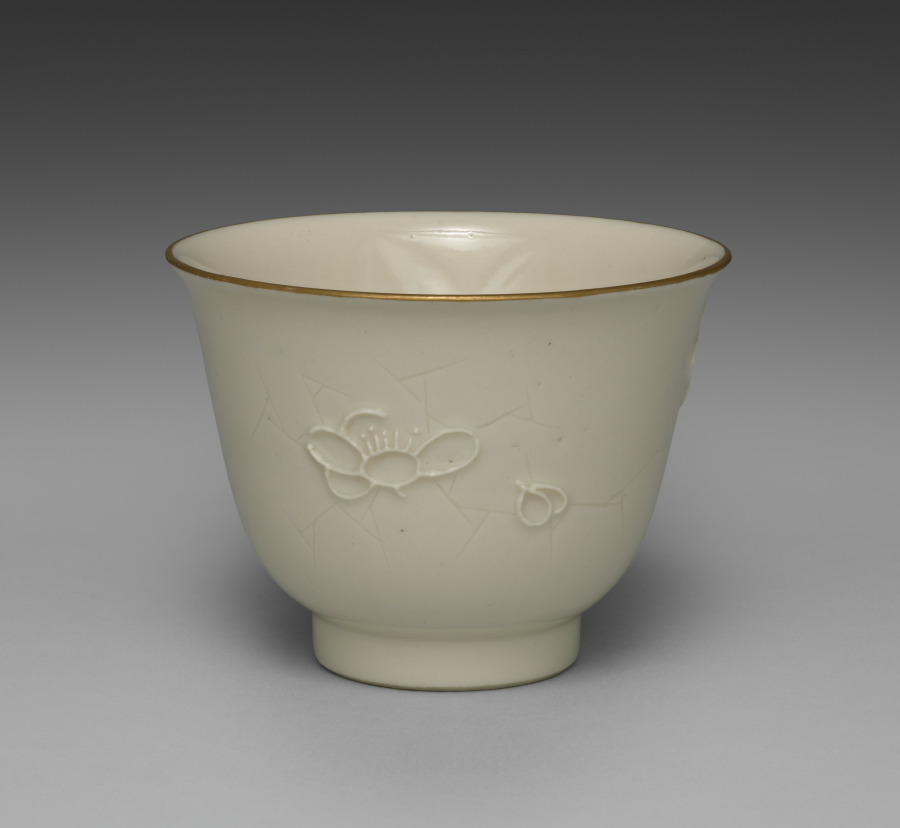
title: Drinking Cup from Dining Set with Plum Blossoms and Cracked-Ice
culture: Japan, Meiji period (1868–1912)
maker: Seifū Yohei II (Japanese, 1844–1878)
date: c. 1875–78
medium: Porcelain with molded designs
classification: Ceramic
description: Each item in this set has a delicate low-relief design of flowering plum branches over scattered, intersecting lines meant to resemble the cracked-ice surface of a frozen body of water and is signed on the base in gold pigment. While Yohei II produced many fine works in underglaze blue, like those produced by Kiyomizu Shichibei, he also made works in quite different styles later in his career, from the early 1870 s. In 1873, he was appointed purveyor to the Industrial Center of Kyoto Prefecture, a designation associated with Kyoto’s efforts to reach an international market through the port of Kobe; and from 1875 until his death, he was involved in national-level projects to present Japanese ceramics across the world. It was during this period that Yohei III was apprenticed to Yohei II, and it has been suggested that this set may in fact be an early example of Yohei III’s work, which he signed with his teacher’s name. Decorated with flowers resembling Japanese textile motifs, the set calls to mind the design of Yohei II’s pair of vases with plum blossoms in the Victoria and Albert Museum. Here, the elaborate trees created for a formal public exhibition setting have been translated into the approachable blossoms of the genteel domestic environment. While the designs are consistent across the pieces, each raised flower petal and pistil and each incised line in the ice was done by hand, so the cups, bowls, and dishes are similar yet unique. The bottoms of two boxes once identified the set’s owner, but the information has been deliberately obscured with black ink. However, inscriptions still visible appear to indicate two occasions, once at the end of July 1886 , and once again in June 1916 , when parts of the set were requested from Hokura in Niigata Prefecture. The location corresponds to a neighborhood in the present-day city of Jōetsu. The surname Tsuji 辻 also appears on a paper tag affixed to one of the box cloths. Future research may possibly reveal more about their provenance. A vase by Yohei III in a private collection combines the formal grandeur of the Yohei II vases in the Victoria and Albert Museum with the gentler design of this dining set, placing flowering plum trees against soft, scalloped-edge clouds resembling those in golden screens.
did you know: The dining wares have a creamy white coloration that the four boxes containing them identify as Korean in style.